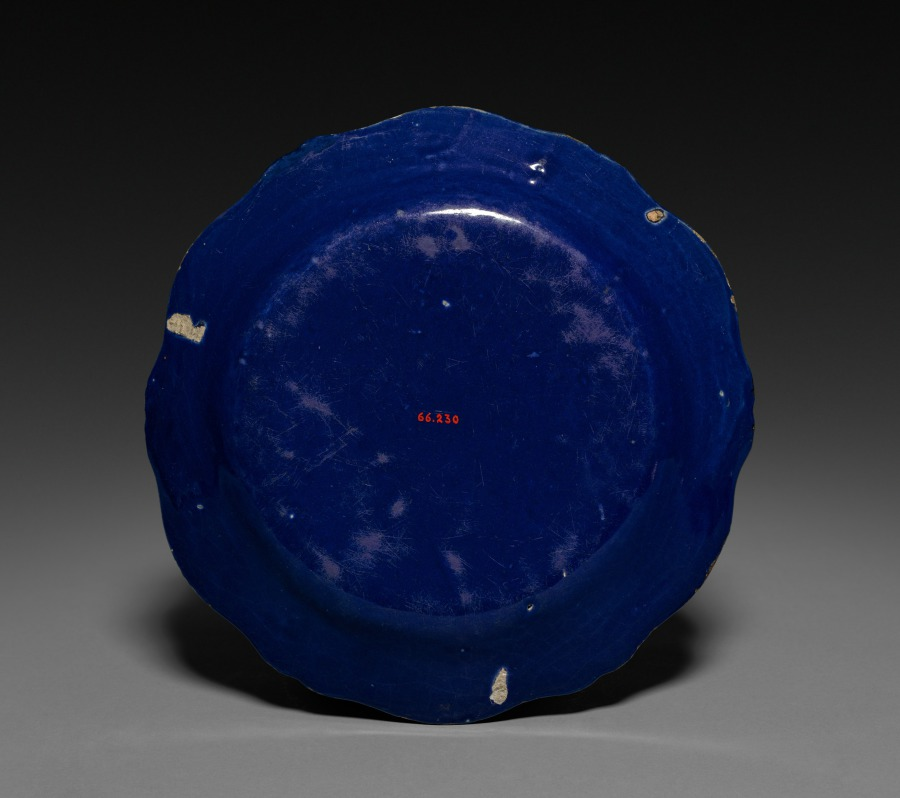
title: Plate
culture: France, 18th century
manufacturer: Saint Omer Factory (French)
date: c. 1765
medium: faience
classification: Ceramic